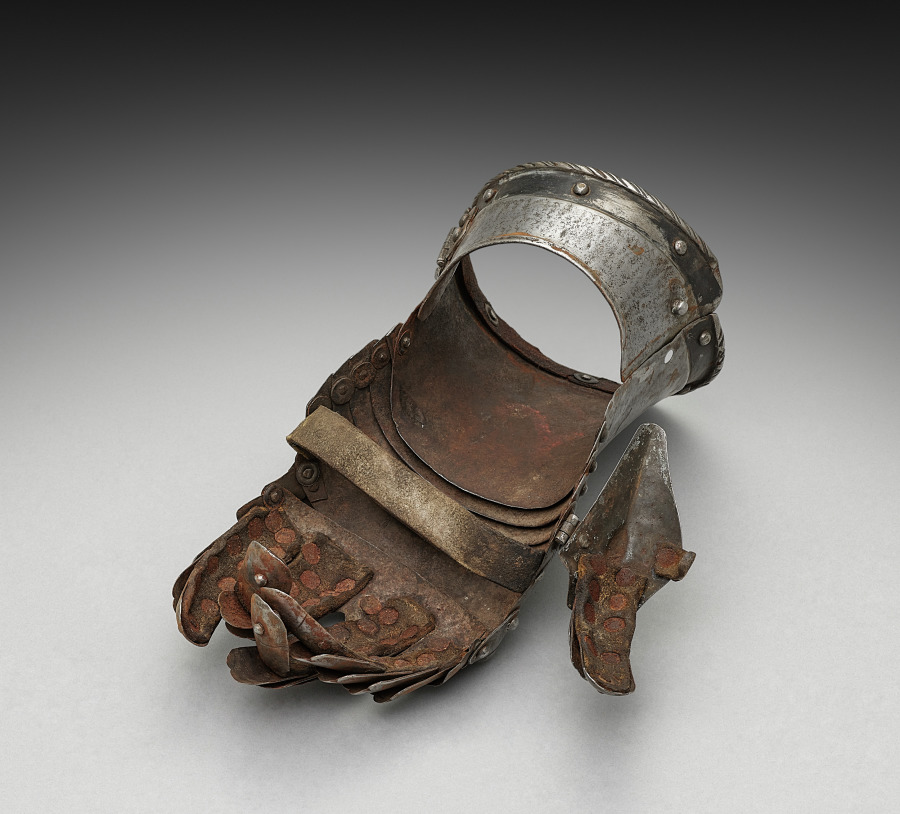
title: Left Gauntlet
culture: Germany, 19th century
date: 1801–1900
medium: steel with black paint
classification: Arms and Armor